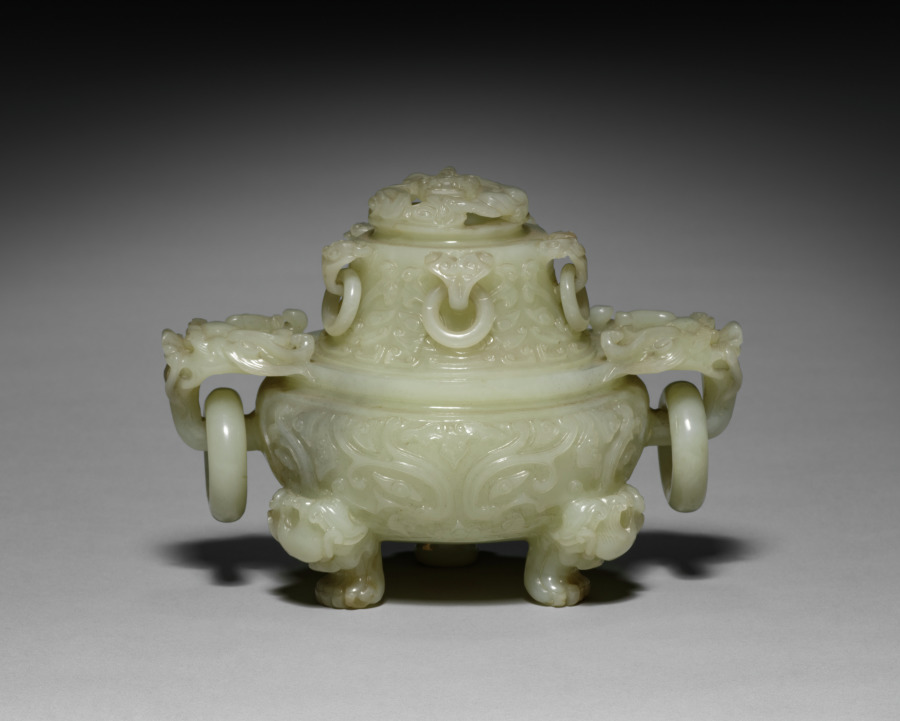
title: Tripod Incense Burner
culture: China, Qing dynasty (1644-1911)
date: 1644–1911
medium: jade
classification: Jade